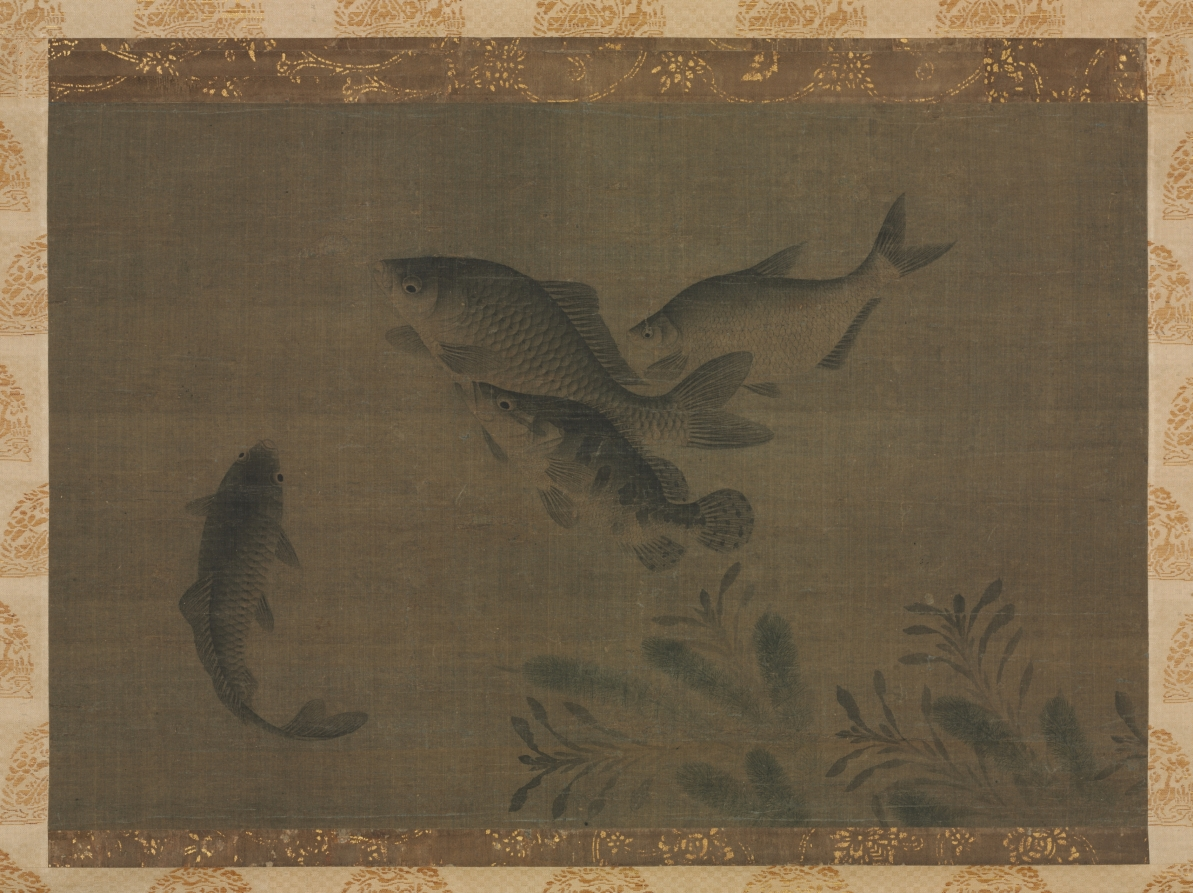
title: Fish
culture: China, Ming dynasty (1368–1644)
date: c. 1400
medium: hanging scroll, ink and slight color on silk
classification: Painting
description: Four fish of various sizes are swimming among aquatic plants. Like in other paintings, the existence of water is suggested in the harmonious movement of the fish and plants. In Chinese, the word for fish (yu) is a homophone for “abundance” and thus the motif has an auspicious connotation. The painter uses the so-called boneless technique without outlines to shade and texture the bodies of the fish. The smooth transition from dark shades on their backs to their white bellies and the thin transparent fins and tails in light washes accentuated by gills and scales are all executed without contour lines.